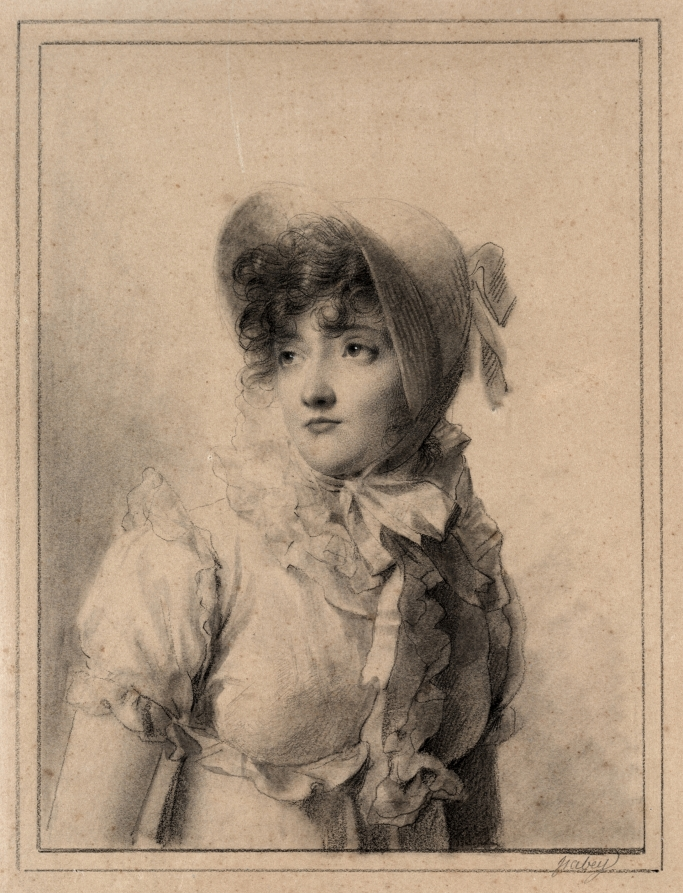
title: Portrait of Comtesse Starjinska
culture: France, 18th century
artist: Eugène Isabey (French, 1803–1886)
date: 1800s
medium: charcoal, black crayon, brush and grey wash, and graphite, heightened with traces of white gouache; framing lines in black crayon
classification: Drawing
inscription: signed, lower right, in graphite: Isabey; VERSO OF SUPPORT, upper left, in blue crayon: [Ib. ?] [on sticker]